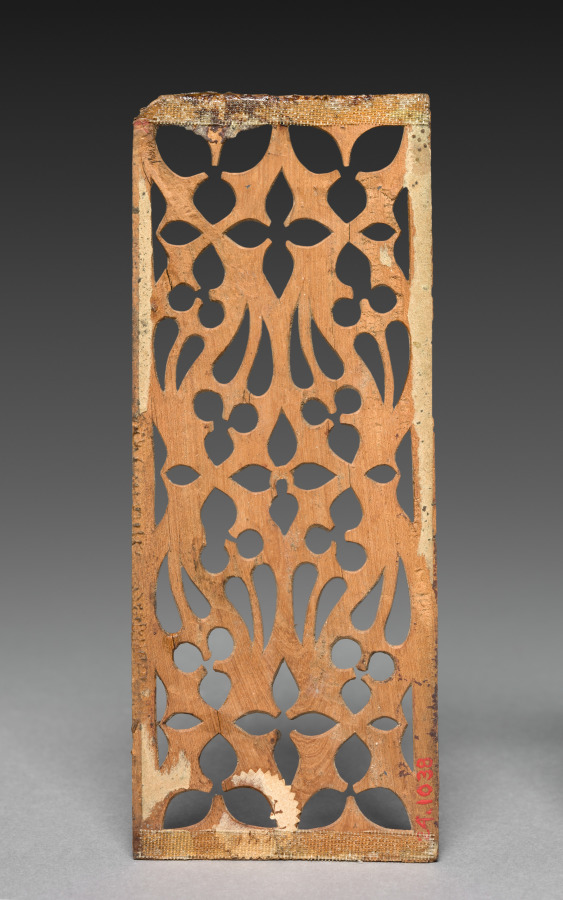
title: Panel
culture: France, 15th century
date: late 1400s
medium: walnut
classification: Furniture and woodwork